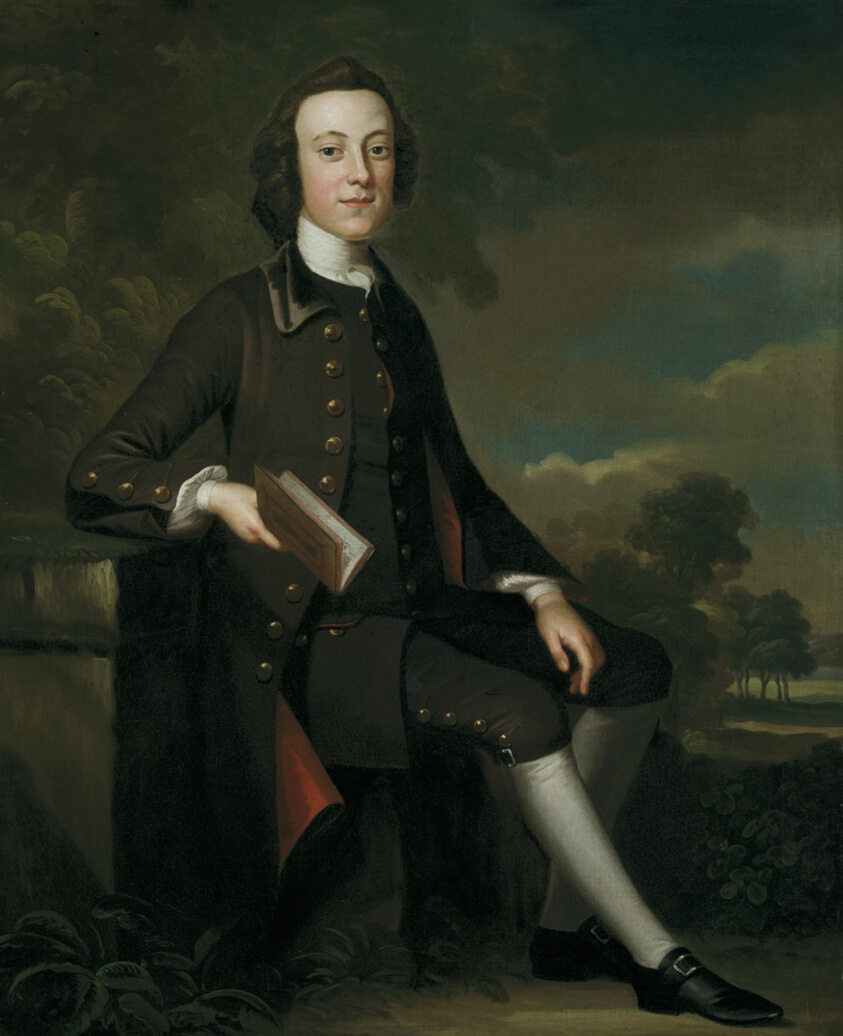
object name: Painting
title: Portrait of a Young Man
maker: John Wollaston (American, born England, c. 1710–c. 1775)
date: 1749–52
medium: Oil on canvas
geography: United States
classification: painting; american arts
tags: fashion, people, portraits